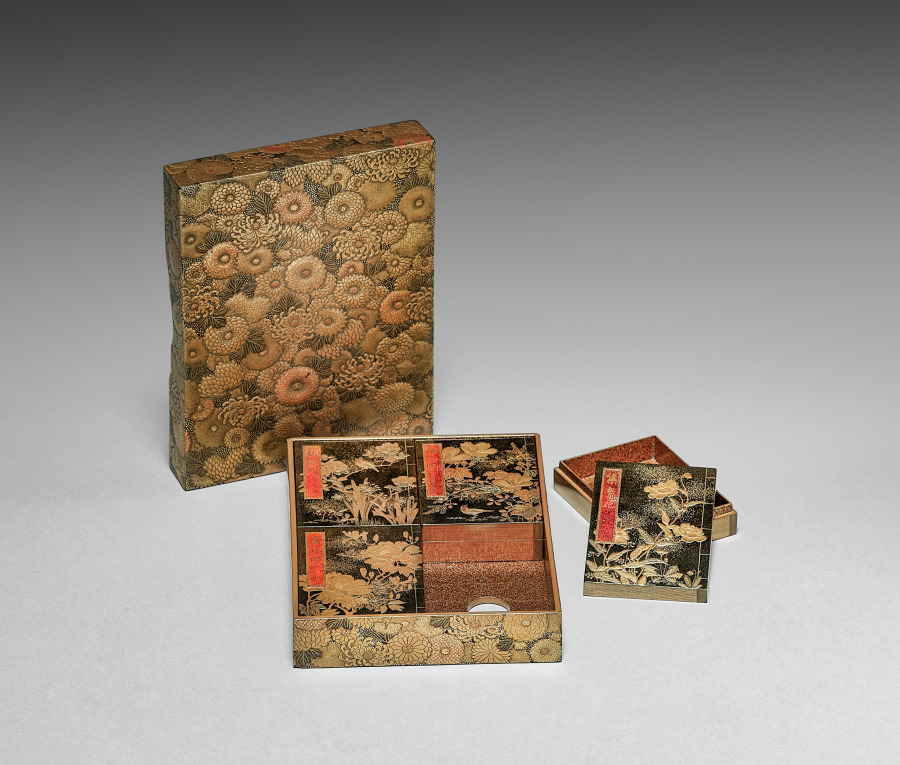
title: Nested Boxes with Chrysanthemums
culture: Japan, Meiji period (1868–1912)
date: early 1900s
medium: Set of five boxes; lacquered wood with sprinkled gold powder (maki-e)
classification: Lacquer